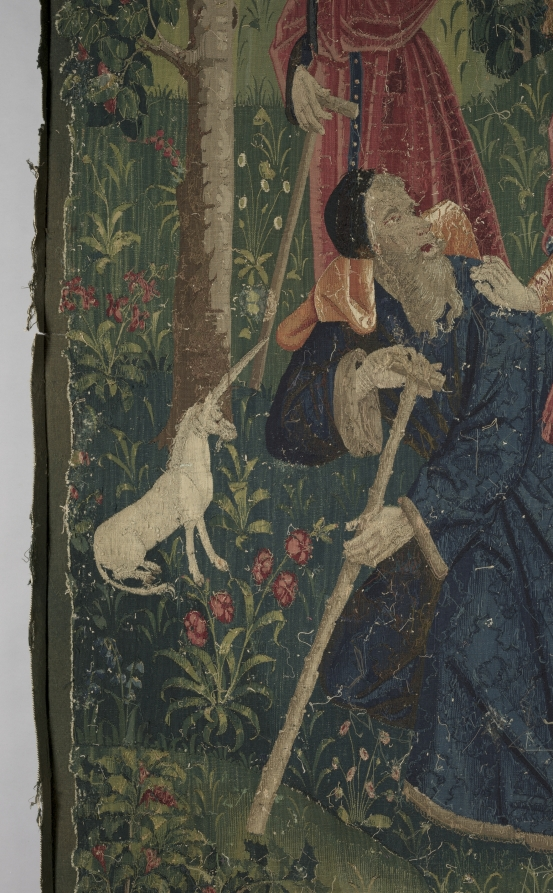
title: Time (from Chateau de Chaumont set)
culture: France, Lyon(?), early 16th century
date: 1512–15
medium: silk and wool; tapestry weave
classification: Tapestry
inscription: French verse in Gothic letters translates as follows: "One sees the weather adorned in green, Sometimes as pleasing as an angel; To suddenly change and be quite strange, The weather never stays the same."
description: Pierre Sala, who likely commissioned the set, is portrayed as the richly attired central figure offering a bouquet, a symbol of knowledge, to Éléonore, his daughter. Éléonore is pregnant, revealed by her upturned skirt and the persimmon in her husband Hector’s hand. Hector’s mother, Marguerite, in dark attire, will wed the widowed Sala in 1519. They appear in front of the royal chateau of Blois. The figures at the right convey Sala’s advice to his children. Time (the old man with the staff) with Clio, the Muse of History, standing on his shoulders, is being attacked by a Herculean youth wielding a stick. With this allegory, Sala is explaining that youth is ignorant of the complexities of life and time. The small unicorn at the far right represents the soul. The verse in Old French at the top refers to changing time: One sees Time adorned with green foliage, Sometimes as pleasant as an angel, Then suddenly change and become quite strange. Never does Time persist in one state.